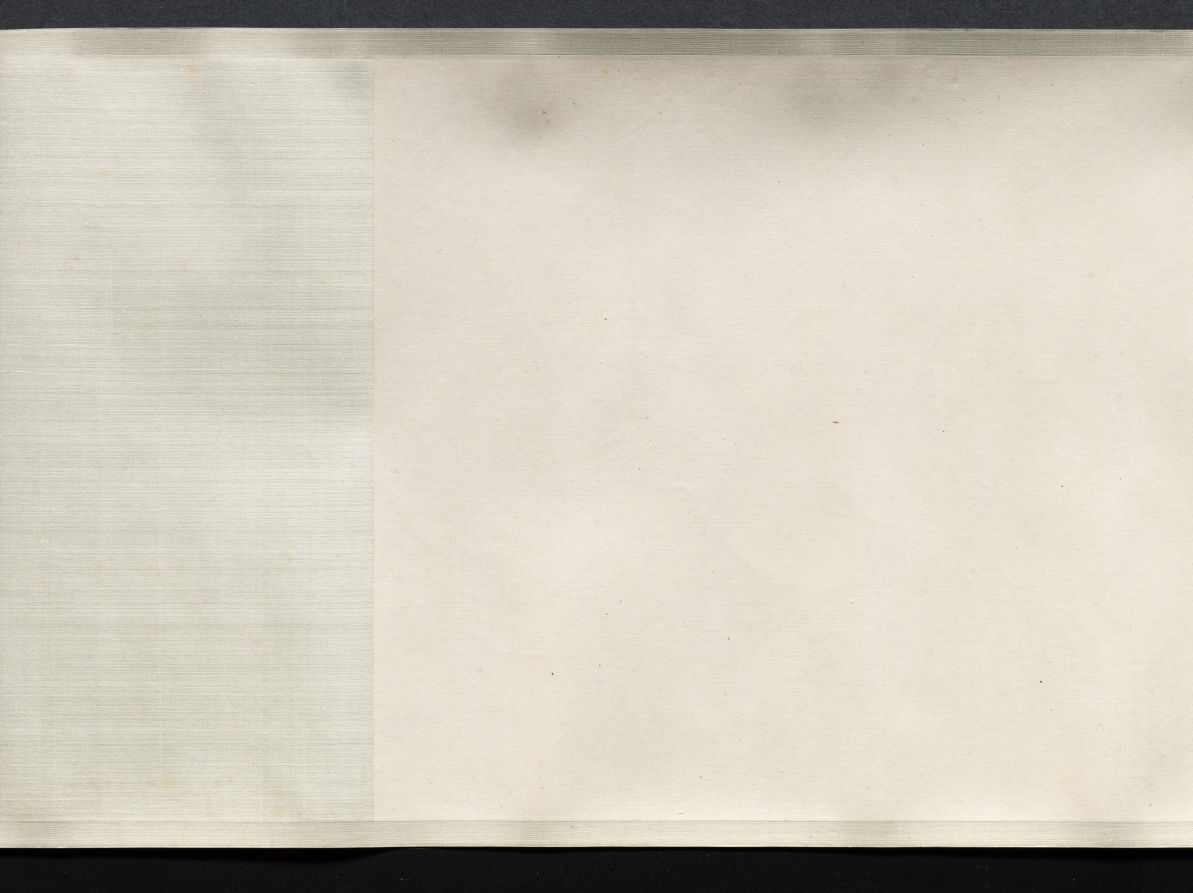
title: Autumn Mist in the Countryside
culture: China, Qing dynasty (1644-1911)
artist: Zou Zhe (Chinese, c. 1610-before 1688)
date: 1647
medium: handscroll, ink and color on paper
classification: Painting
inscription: Artist's inscription, signature, and seal: The first day of the sixth lunar month, the ting-hai year [1647], Tsou Che painted [this]. [seal] Fang-lu.